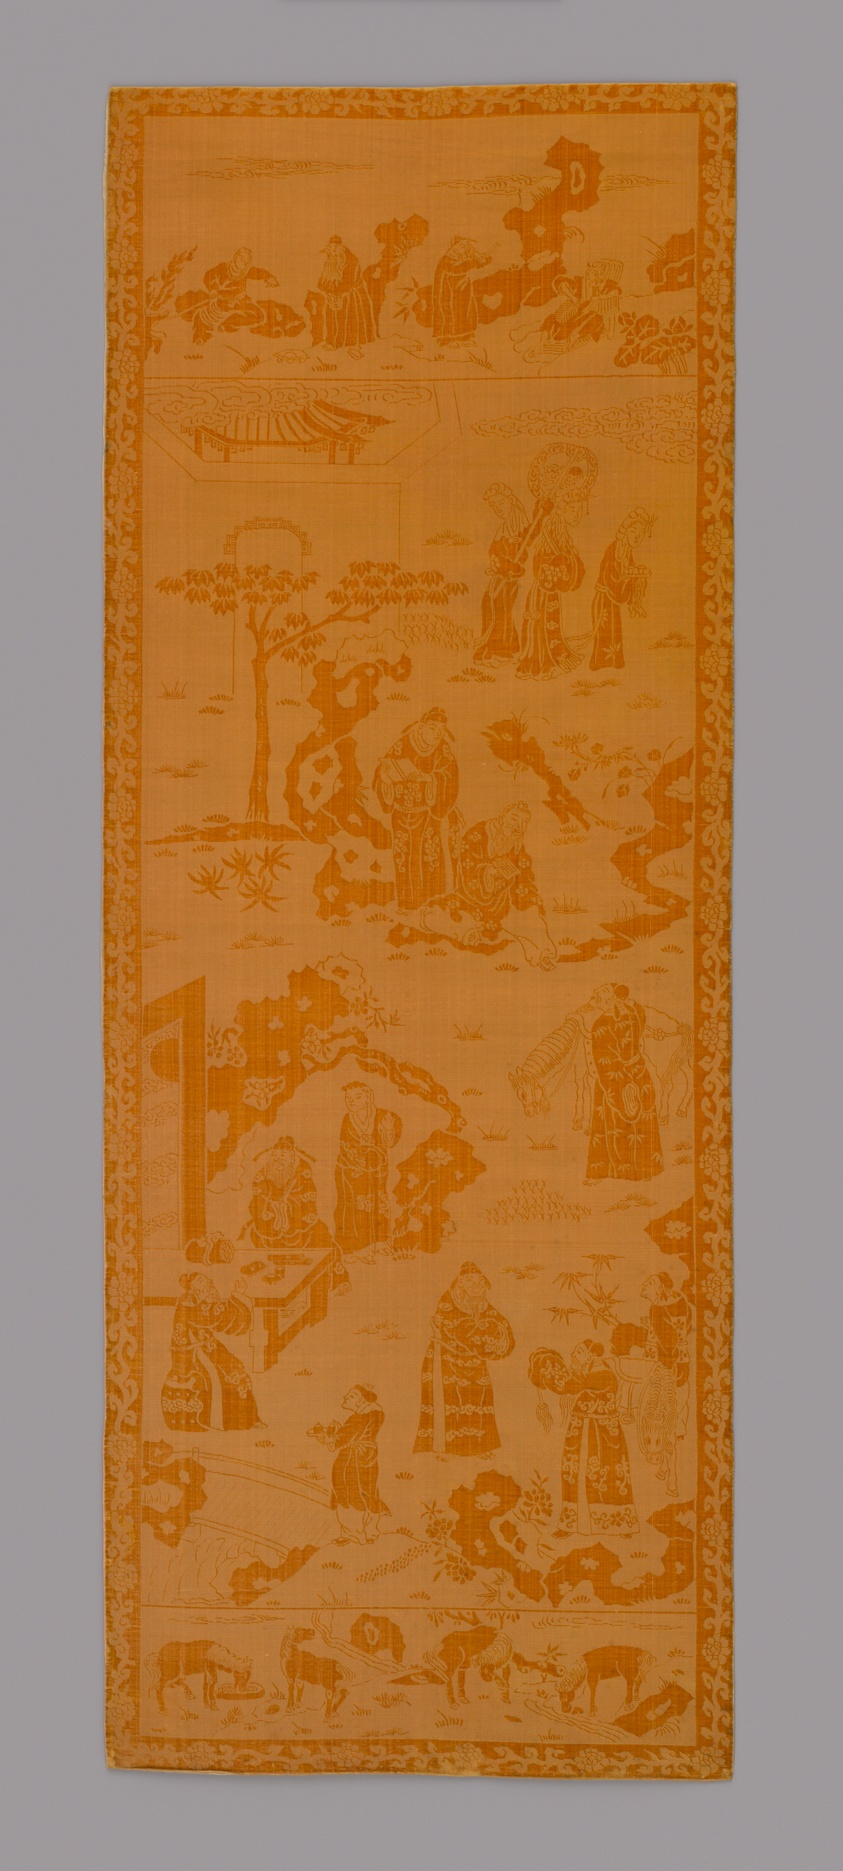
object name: Textile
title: Panel (Furnishing Fabric)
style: qing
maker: China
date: 18th century, Qing dynasty (1644–1911)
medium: Silk, satin weave with supplementary pile warps forming cut and uncut solid velvet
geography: China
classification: textile; weaving - velvet; furnishing textile